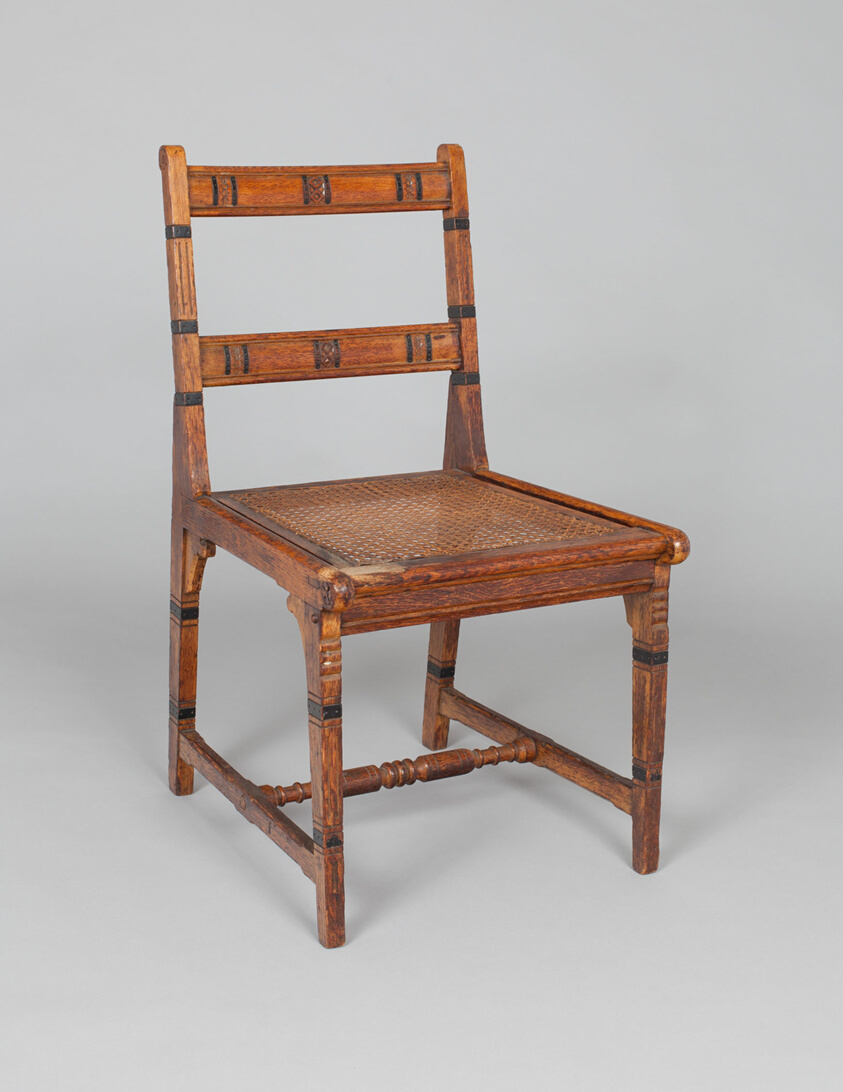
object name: Furniture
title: Dining Room chair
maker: Peter Bonnett Wight (American, 1838–1925)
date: 1876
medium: Oak and cane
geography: Chicago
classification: seating; furniture; american decorative arts; american arts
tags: Chicago